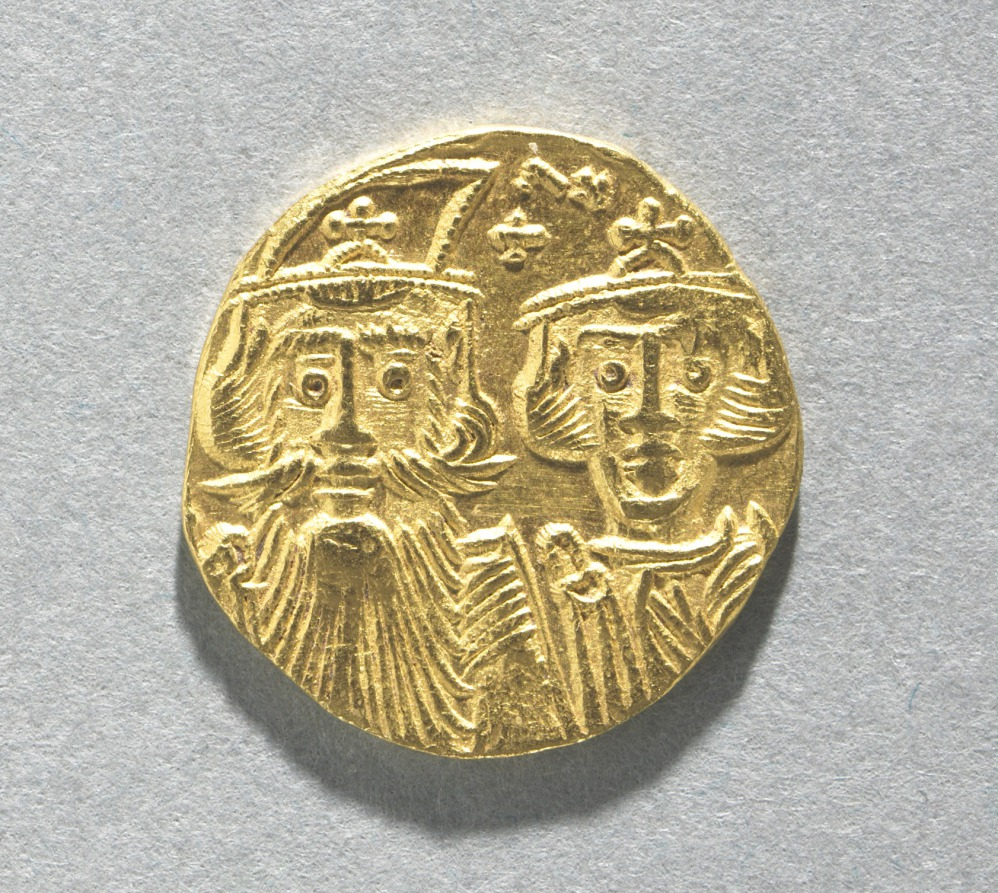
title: Solidus with Busts of Constans II and Constantine IV (obverse)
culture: Byzantium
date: 659–661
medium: gold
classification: Coins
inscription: VICTORIA AVGU and officina letter (cut off and incomplete)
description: The vast number of surviving Byzantine coins attests to the level of trade across the empire. Controlled and supervised by the emperor, the producers of coins took care to represent his authority and reflect his stature. Talented artists were recruited to engrave the dies (molds) used for the striking of coins. Emperors increasingly came to include their heirs and co-emperors on their coinage, as well as other family members or even earlier rulers. Coins were recognized, then as now, as small, portable works of art. With their inscriptions and images, Byzantine coins provide valuable documentation of historical events and a record of the physical appearance of the emperors. The coin shown here is the solidus, the basic gold coin of 24 karats.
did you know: The emperor depicted on the left was also known as "Constantine the Bearded."